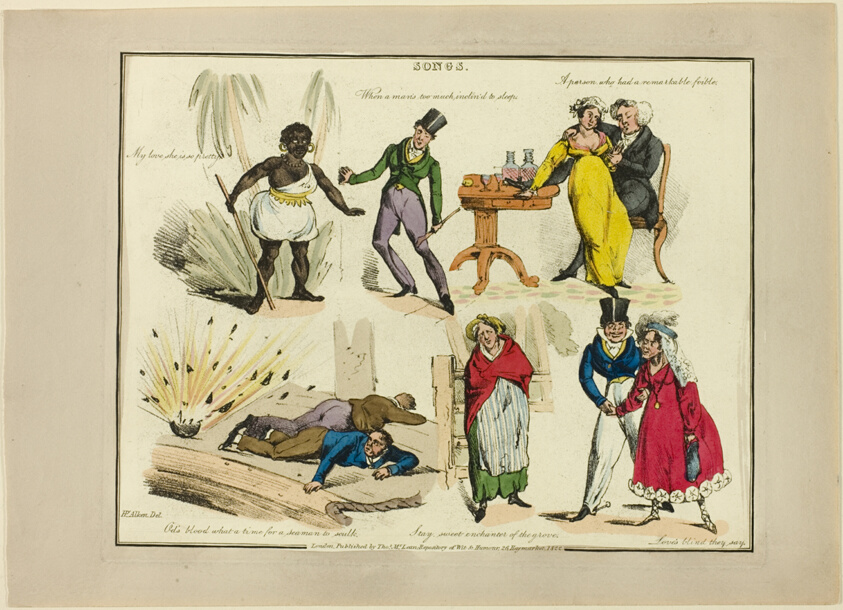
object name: Print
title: Plate from Illustrations to Popular Songs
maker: Henry Alken (English, 1785-1851); published by Thomas McLean (English, active 1790-1860)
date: 1822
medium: Soft ground etching with hand-coloring and aquatint on paper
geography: England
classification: etching; print; prints and drawing